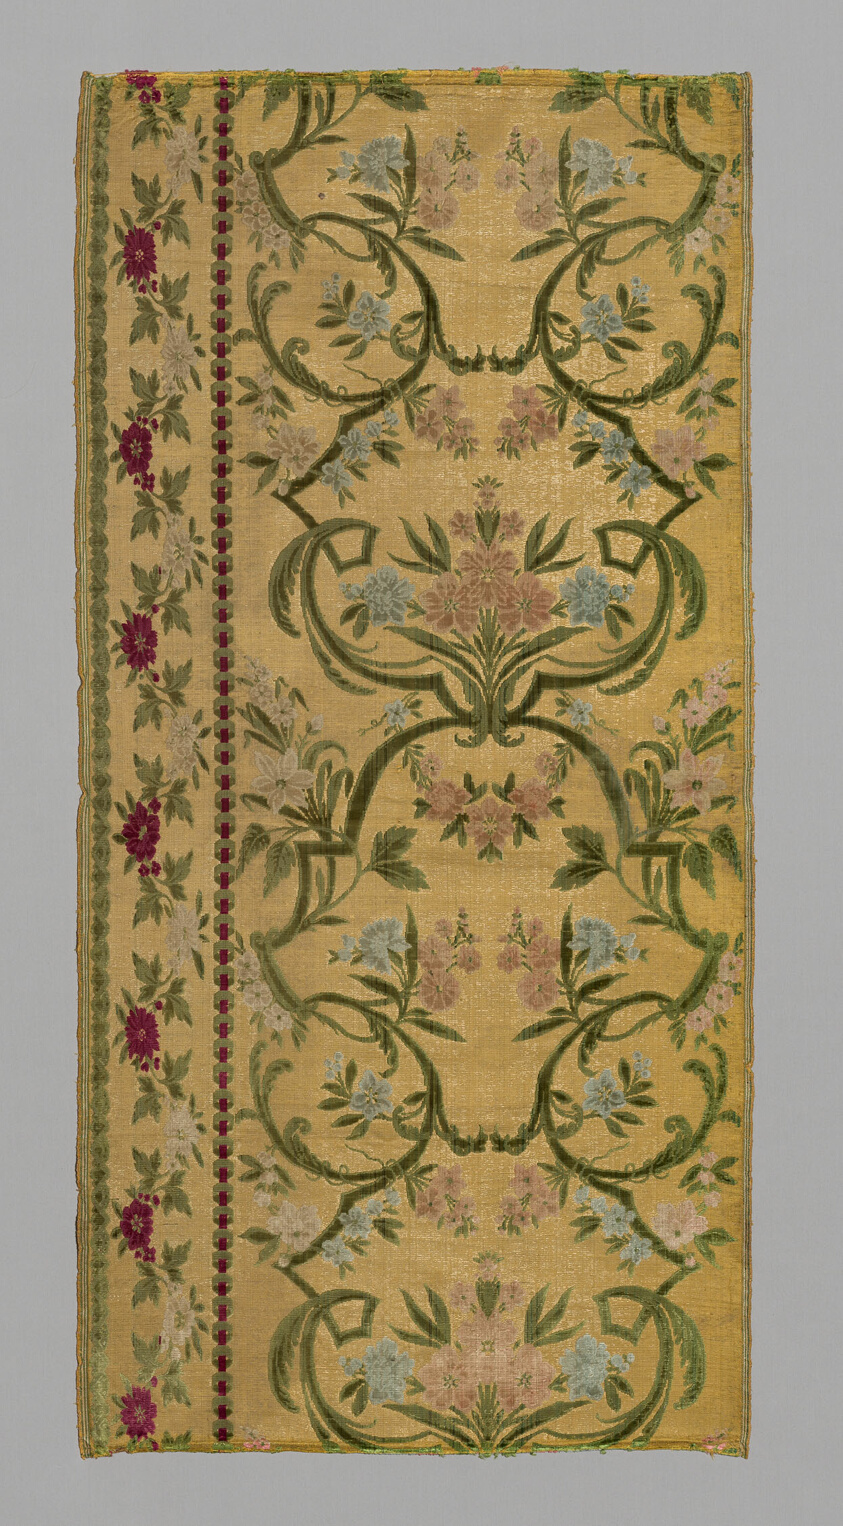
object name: Textile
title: Panel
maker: France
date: 17th/18th century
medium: Silk and gilt-metal strip, twill weave with supplementary patterning wefts and pile warps forming cut and uncut voided velvet Silk, cut, uncut, voided velvet with additional patterning wefts of gilt strips against twill weave foundation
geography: France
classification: textile; weaving - velvet